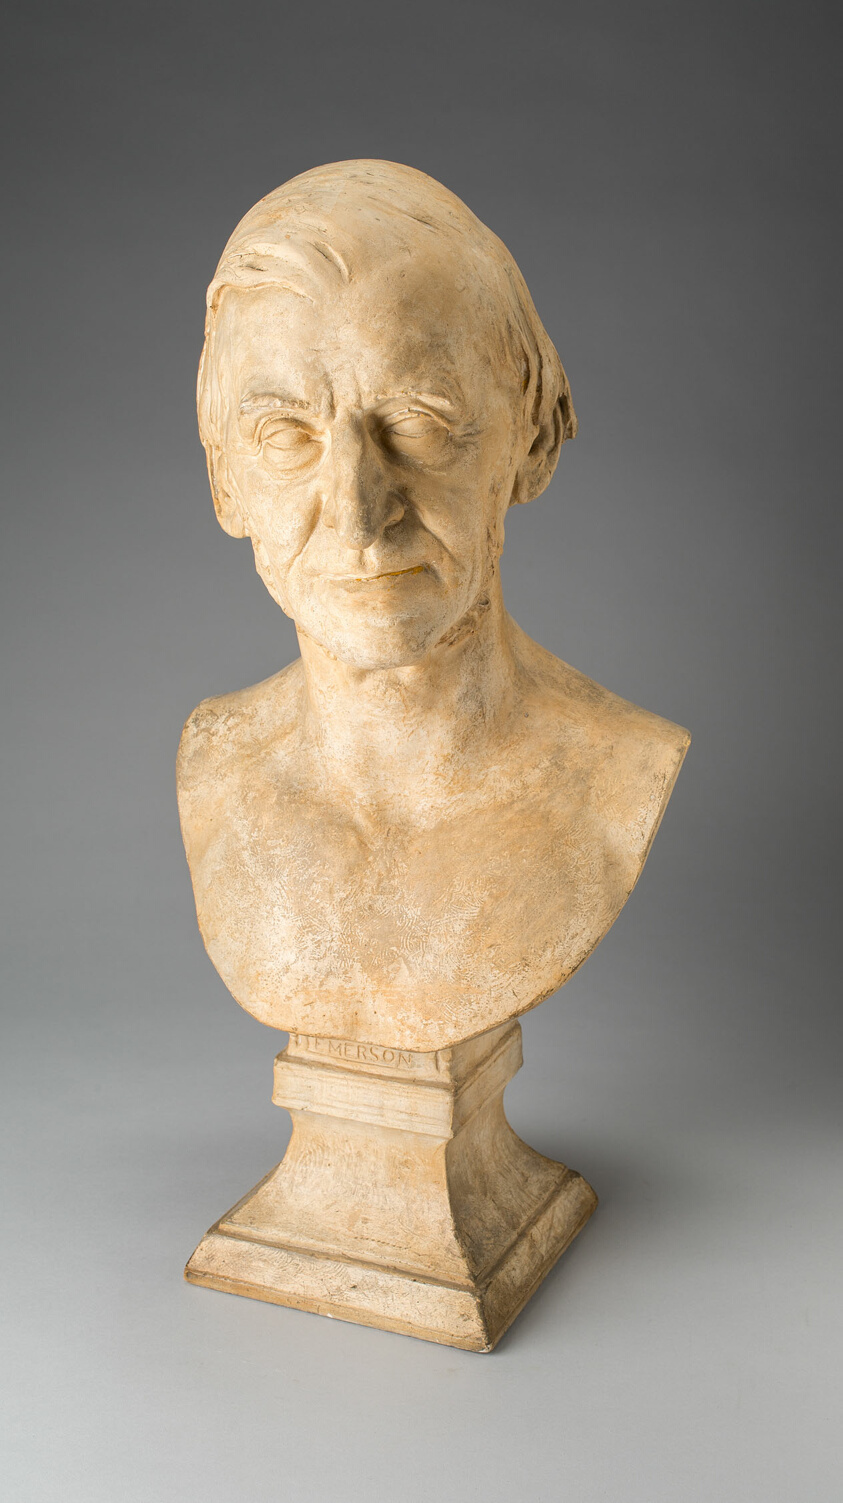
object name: Sculpture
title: Ralph Waldo Emerson (1803-1882)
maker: Daniel Chester French (American, 1850–1931)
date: modeled 1879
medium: Plaster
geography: New York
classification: sculpture; american arts